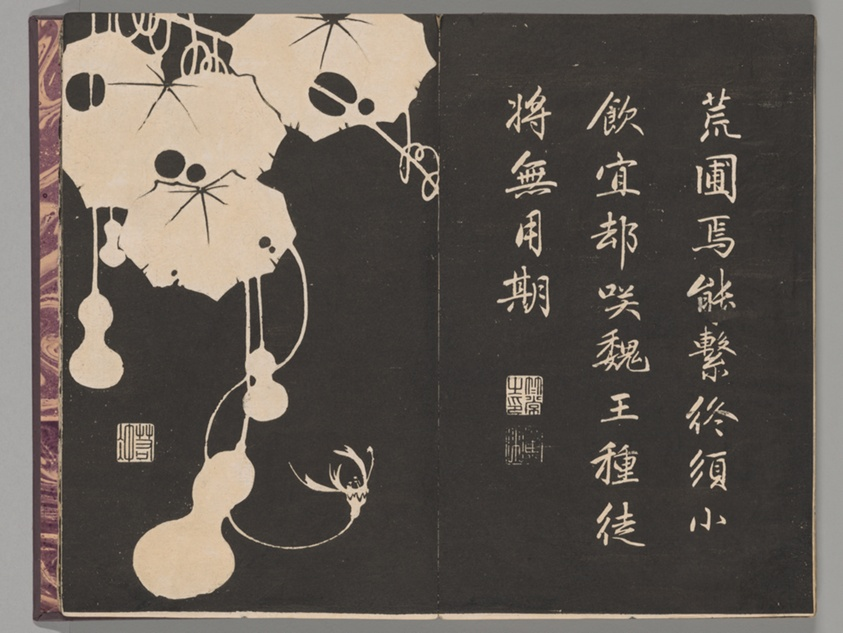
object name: Book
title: Soken sekisatsu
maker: Ito Jakuchu (Japanese, 1716-1800)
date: 1767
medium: Woodblock printed book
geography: Japan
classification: book